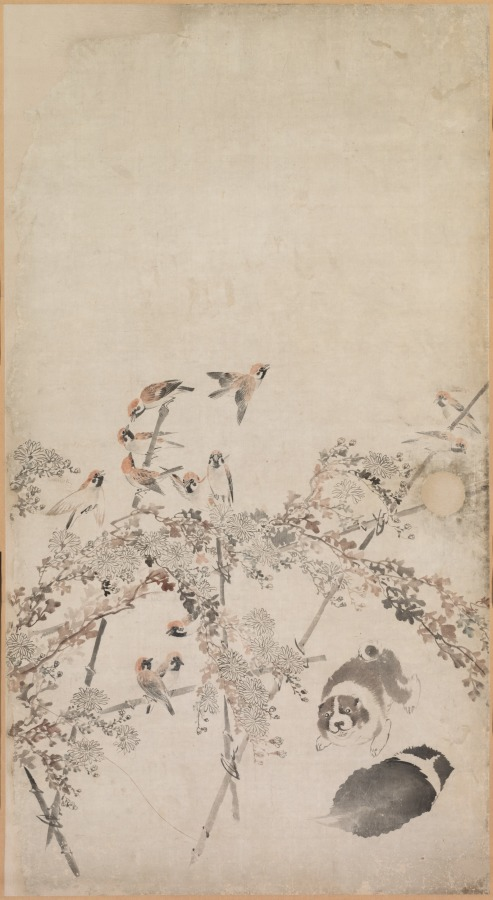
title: Puppies, Sparrows, and Chrysanthemums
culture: Japan, Edo period (1615–1868)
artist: Nagasawa Rosetsu (Japanese, 1754–1799)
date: c. 1792–94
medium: Fusuma panel remounted as a hanging scroll; ink and slight color on paper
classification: Painting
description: These paintings were originally mounted as sliding doors (fusuma) used inside a building. The circular areas on the paintings’ paper surfaces are traces of the former positions of the door pulls (hikite). A flock of sparrows gathers on a trellis supporting flowering chrysanthemum. Below is a litter of puppies, some cavorting, others napping. The tender story created by the curious puppy peering up and tilting its head to listen to the bird’s insistent call (in the leftmost part of the composition) is characteristic of Nagasawa Rosetsu’s paintings, which often use animals to illustrate the human condition.